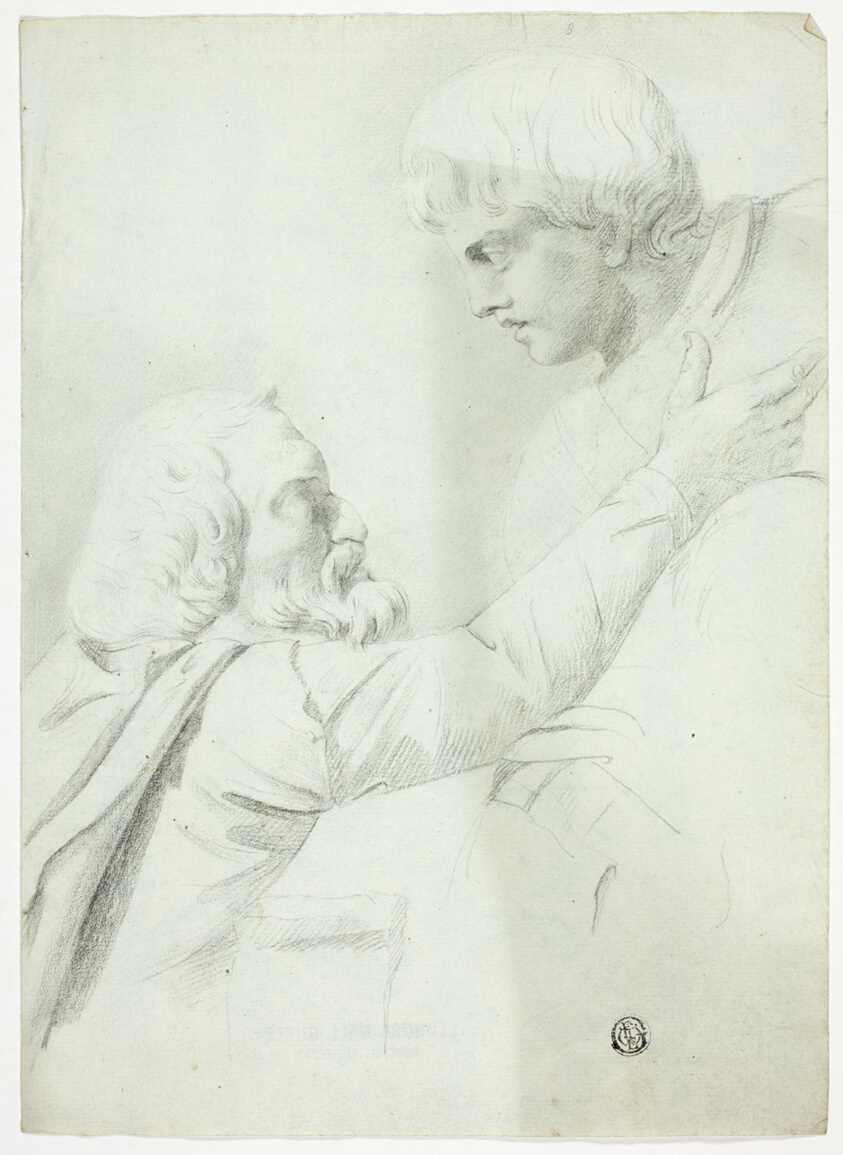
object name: Drawing and Watercolor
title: Bearded Man and Boy (from Bas-Relief)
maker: John Downman (English, 1750-1824)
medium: Charcoal on pale blue laid paper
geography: England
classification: charcoal; drawings (visual works); prints and drawing